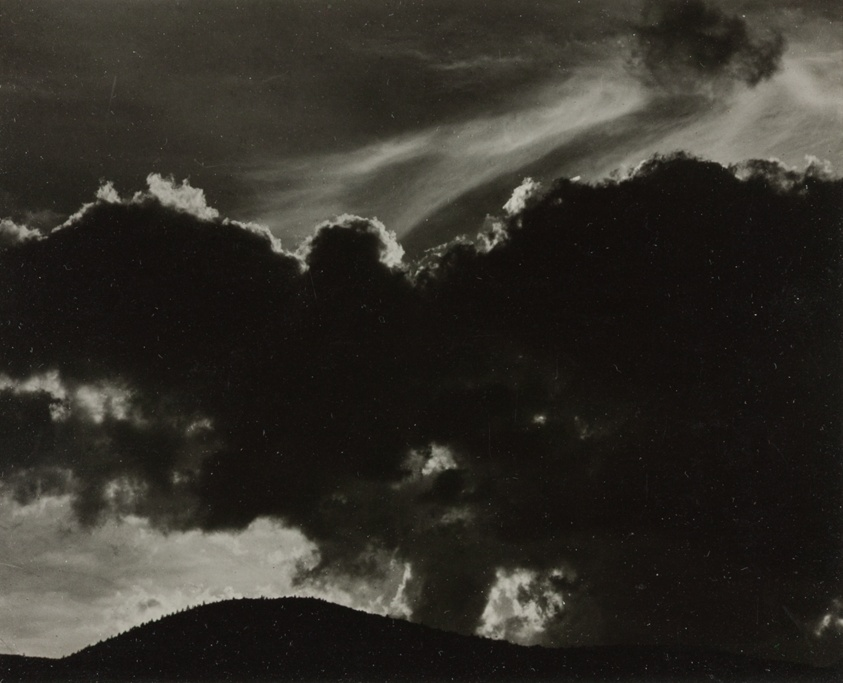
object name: Photograph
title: Equivalent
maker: Alfred Stieglitz (American, 1864–1946)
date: 1924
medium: Gelatin silver print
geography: United States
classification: gelatin silver (developing-out-paper) pr; photographic process; photography; photograph